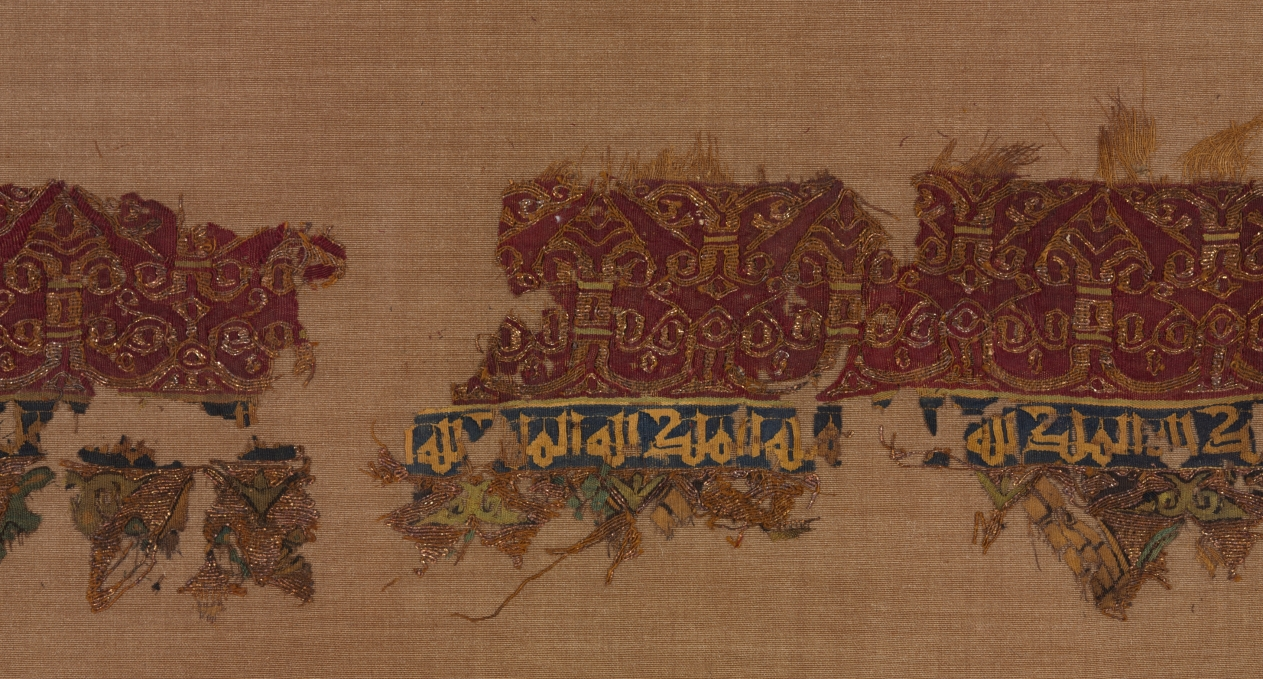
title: Tiraz with gold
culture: Egypt, Fatimid period, reign of Caliph al-Hakim, 1013–1020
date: 1013–1020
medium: plain weave with inwoven tapestry weave: linen, silk, and gold filé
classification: Textile